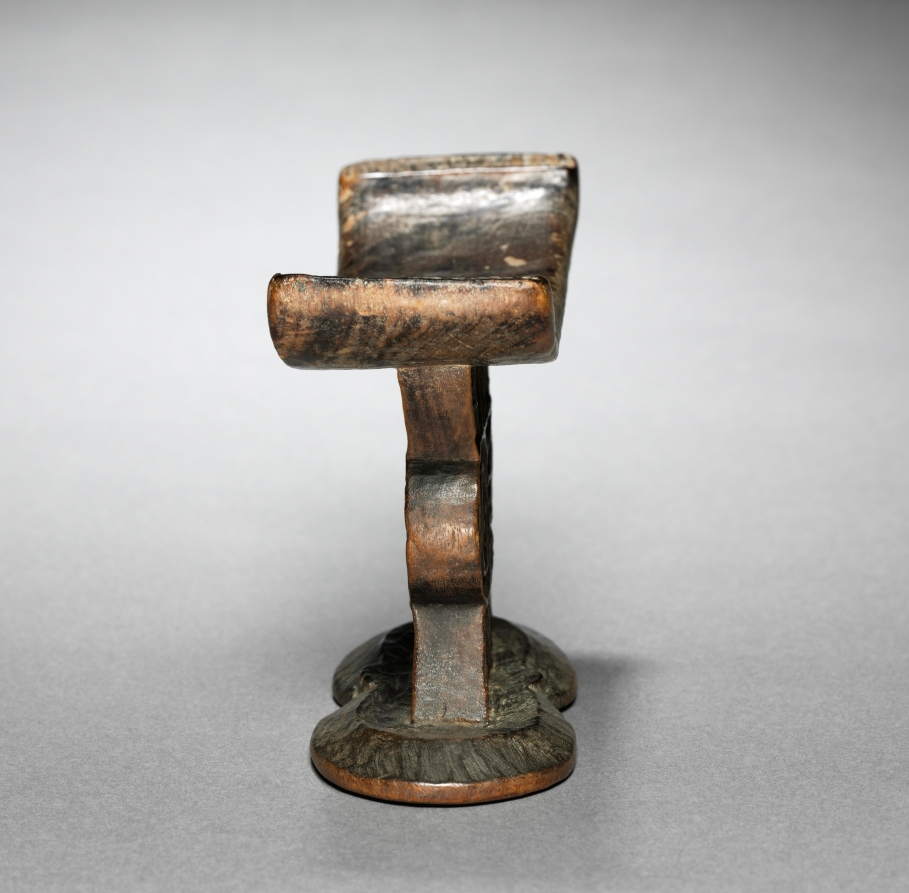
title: Headrest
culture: Africa, Southern Africa, Mozambique, Shona-style maker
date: 1900s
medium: Wood and colorant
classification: Furniture and woodwork